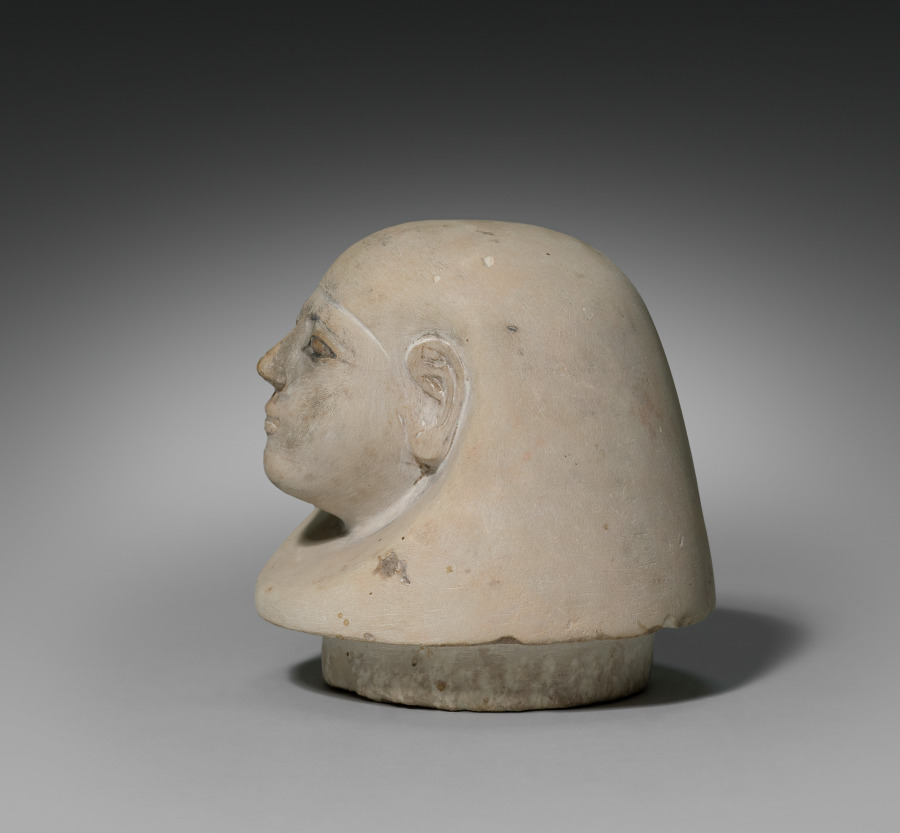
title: Canopic Jar with Lid (lid)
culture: Egypt, New Kingdom (1540–1069 BCE), Dynasty 18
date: 1540–1296 BCE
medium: limestone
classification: Funerary Equipment